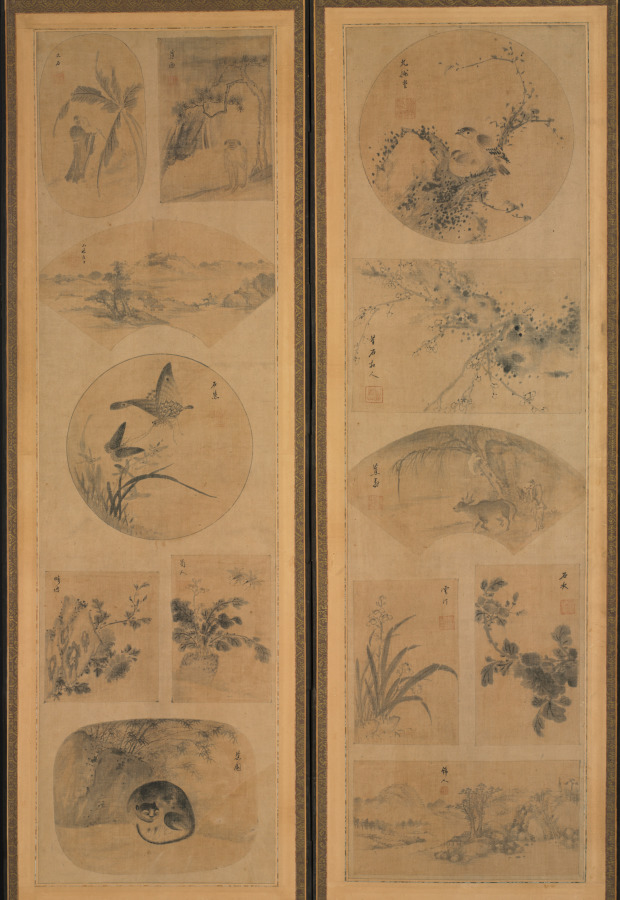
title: Painting of One Hundred Themes (obverse)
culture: Korea, Joseon dynasty (1392–1910)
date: late 1800s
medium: Ten-panel folding screen affixed with album leaves (obverse), calligraphy (reverse), ink and color on silk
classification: Painting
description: This screen depicts paintings on one side and poems on the other—an economical format often used in Korea to allow the viewer to enjoy both sides of one screen. The front features an assortment of bird-and-flower, landscape, and figural paintings executed according to the brush manner of more than 50 artists. A calligrapher has brushed several Chinese poems about the four seasons on the reverse side, among them "Composing in the Daytime of Summer" by Tang poet Liu Zongyuan (773–819) and "Composing when Spring Begins" by Song scholar Zhang Shi (1133–1180).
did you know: Depicting small images of various subjects became one of the most popular types of painting toward the end of the 19th century.